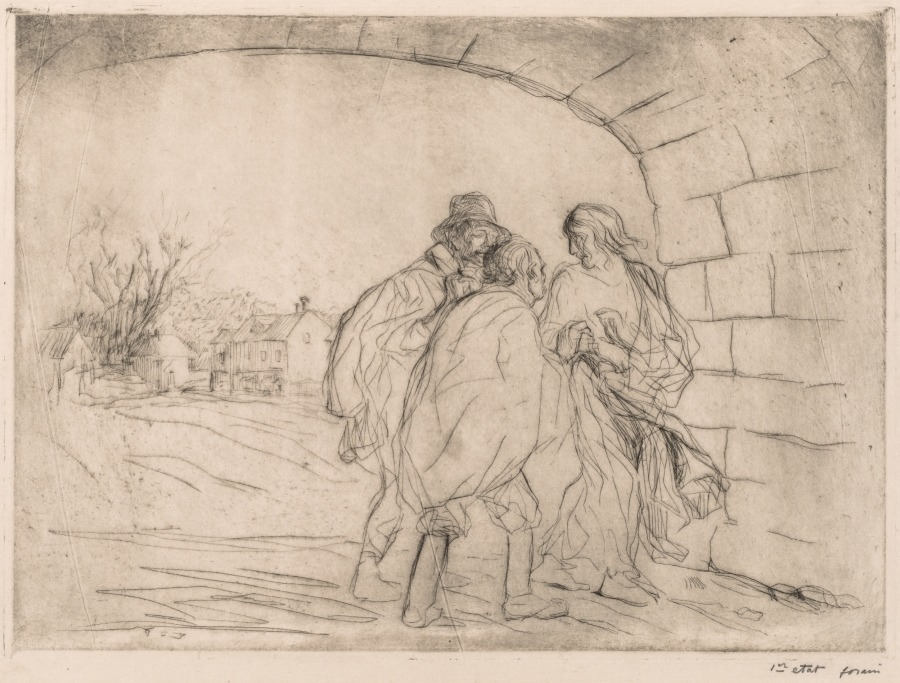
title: Encounter Under the Vault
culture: France, 19th-20th century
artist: Jean Louis Forain (French, 1852–1931)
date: 1910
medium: etching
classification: Print